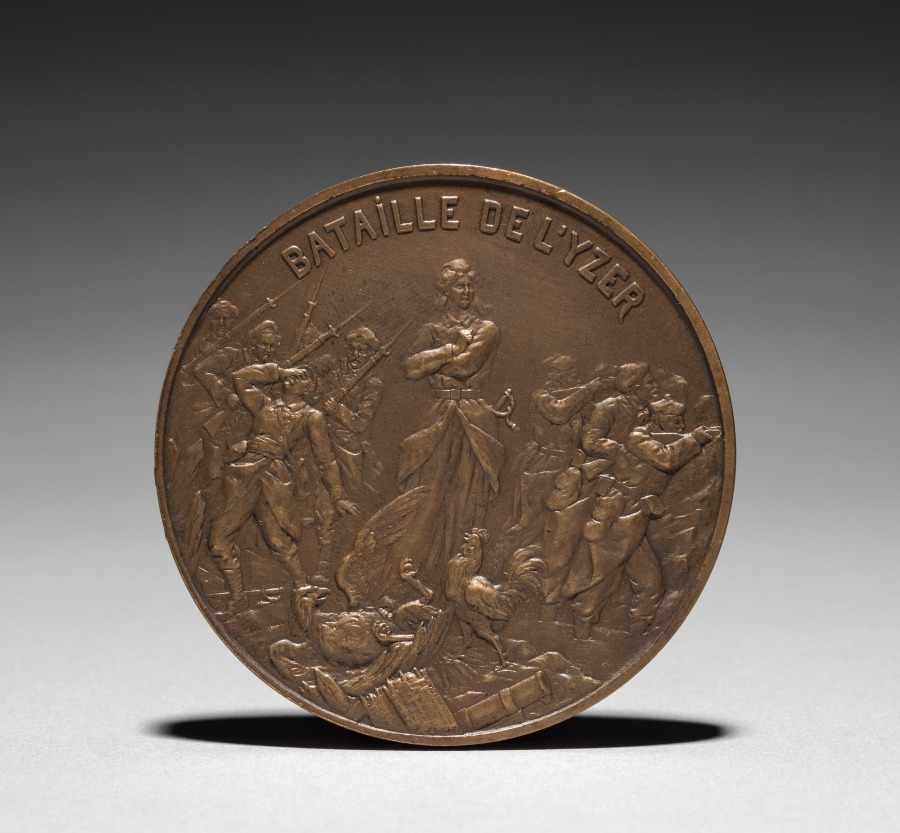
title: Medallion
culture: France, 19th-20th century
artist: Henri Emile Allouard (French, 1844–1929)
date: 1916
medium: bronze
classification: Metalwork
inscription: "Bataille de l'Yzer."